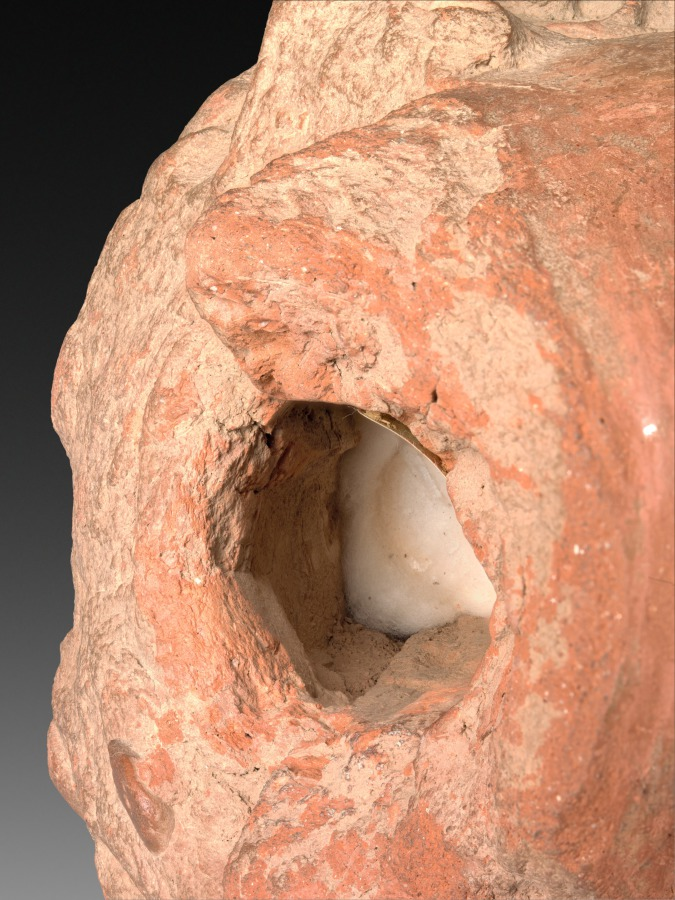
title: Head of Buddha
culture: India, Kashmir, Akhnur school, 8th century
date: 700s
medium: Clay, accidentally burned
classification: Sculpture